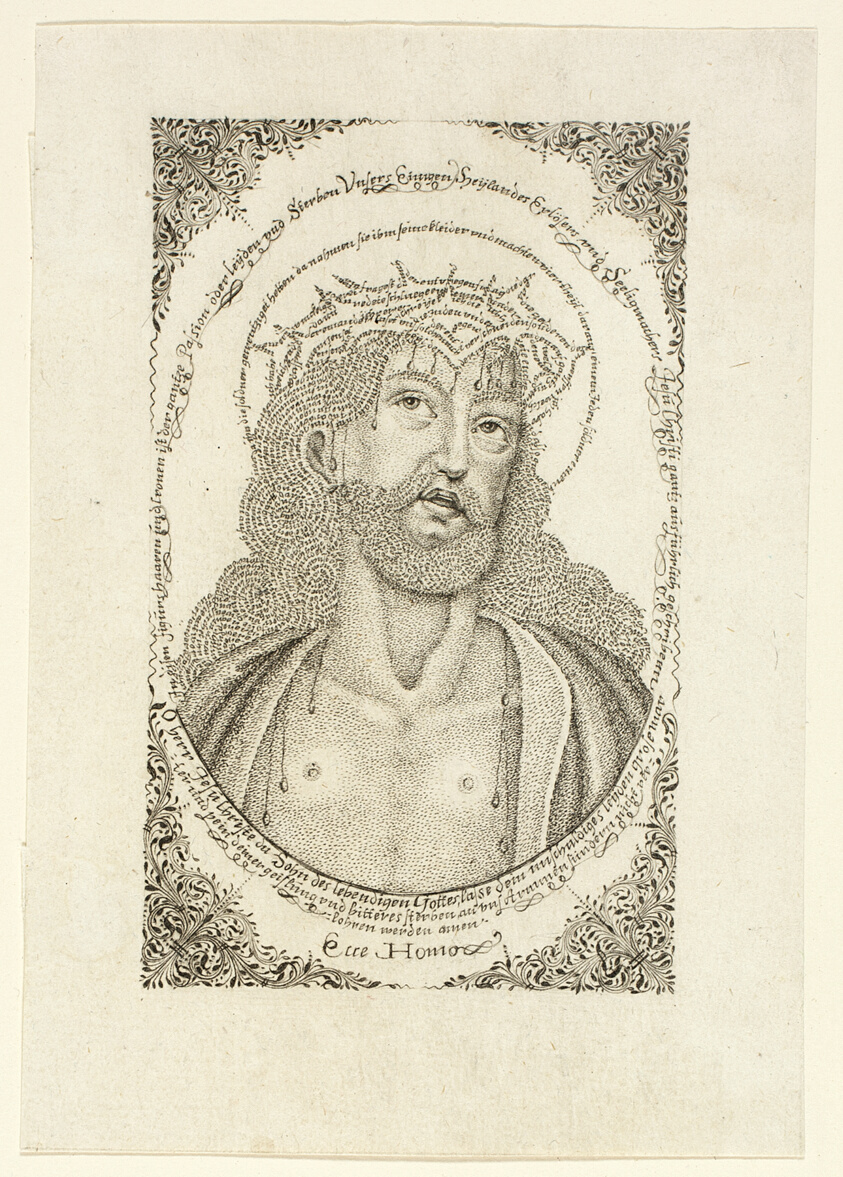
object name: Print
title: Ecce Homo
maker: Johann Michael Püchler (German, active 1679-1709)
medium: Engraving in black on ivory laid paper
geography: Germany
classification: engraving; print; prints and drawing